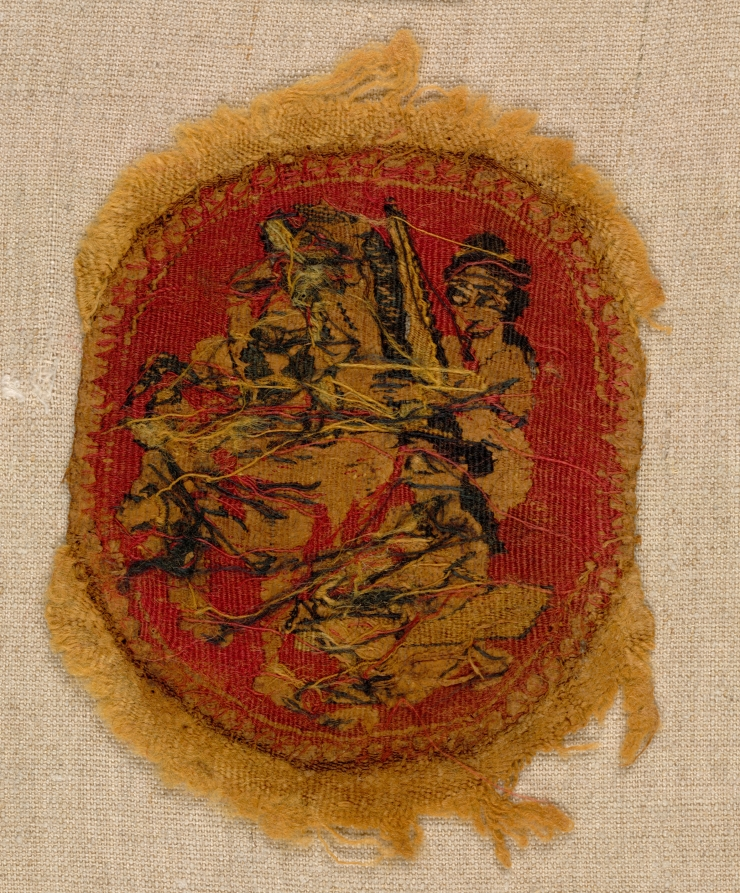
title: Five Round Segmenta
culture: Egypt, Umayyad period (661–750)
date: 650 – 750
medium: tapestry weave: wool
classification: Textile